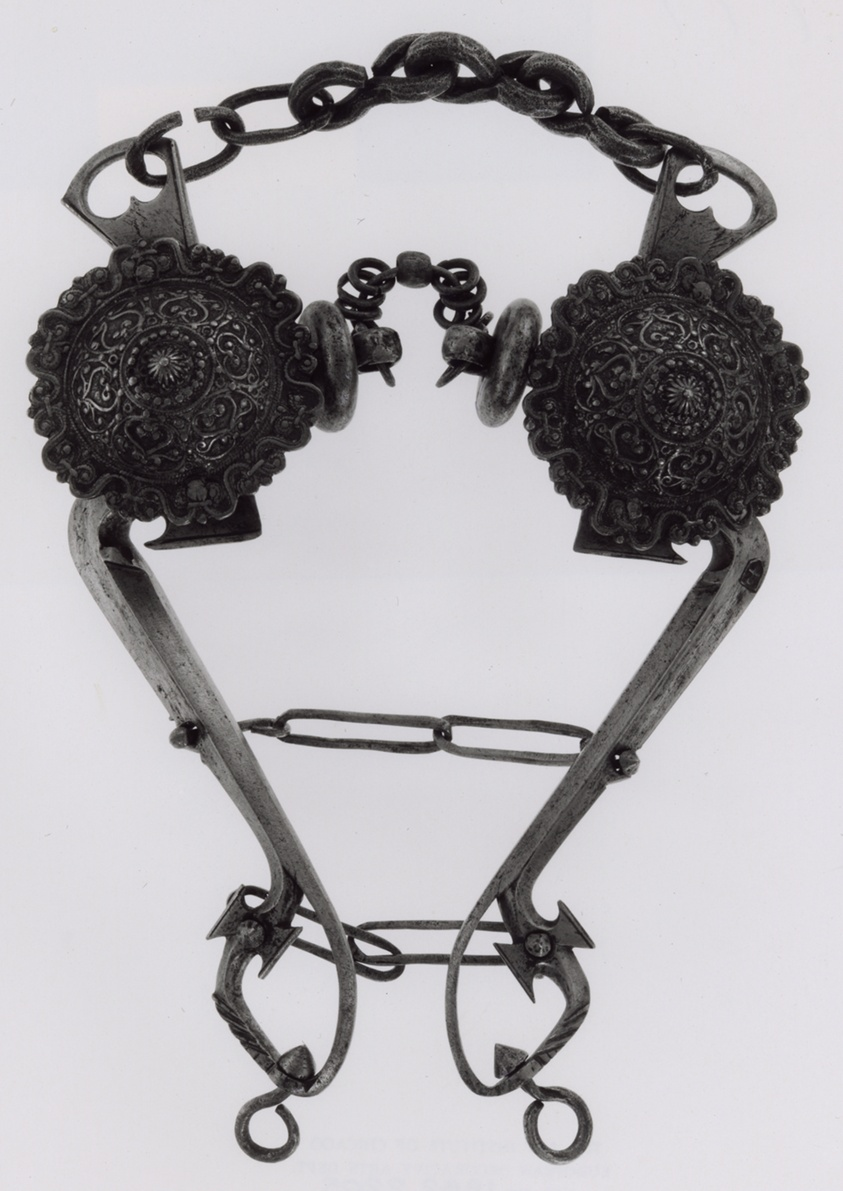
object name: Armor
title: Curb Bit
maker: Southern European (?)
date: 18th century (?)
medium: Iron and copper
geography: Southern Europe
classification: horse equipment; armor; arms and armor